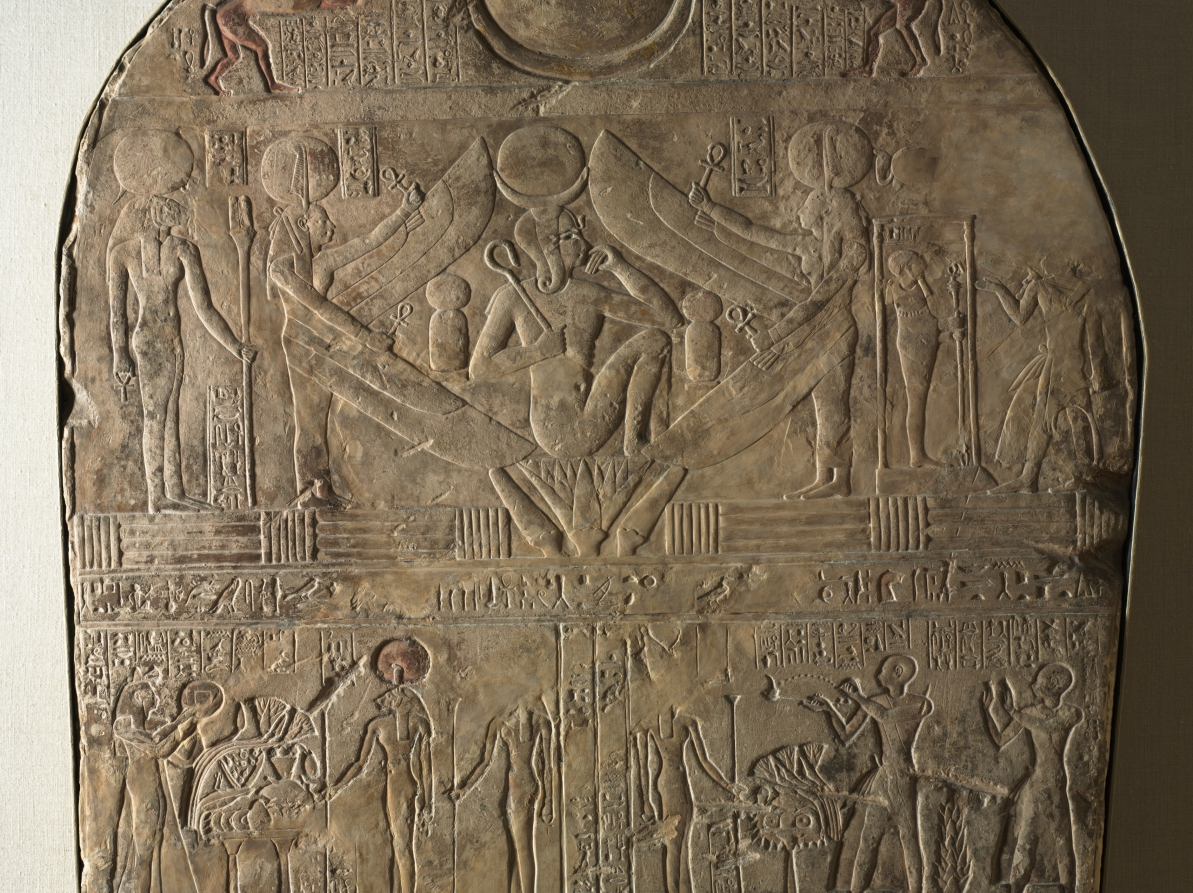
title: Stele of the High Priest of Ptah, Shedsunefertem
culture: Egypt, Third Intermediate (1069–715 BCE), Dynasty 22, reign of Shosheng I (943–922 BCE)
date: 945–924 BCE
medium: limestone, originally painted and gilded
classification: Sculpture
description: This stele of Shedsunefertem, the High Priest of Ptah, is rich in religious symbolism. In the center of the top register is a disk and crescent, originally gilded. At either side a baboon raises its arms in adoration. The Egyptians believed that the jabbering of the baboons at dawn was a hymn of praise to the sun god Ra in a secret language only the king understood. It begins, "Praising Ra when he shines on the horizon." Directly below in the middle register a child god is seated on a lotus flower. In Egyptian mythology the sun arose out of the primeval waters at the dawn of creation in a lotus flower. Winged figures of Maat, goddess of Truth, stand protectively at either side. The damaged figure of the high priest himself, wearing the panther skin and jackal-collar of his office, appears at the far right, worshipping the god Ptah, whose consort, the lioness-headed goddess Sekhmet, appears on the far left. The figures in the bottom register are colleagues who appear here as dependents under the powerful high priest's protection.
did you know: The eye and eyebrow of the young sun-god Ra (at center) were once inlaid.